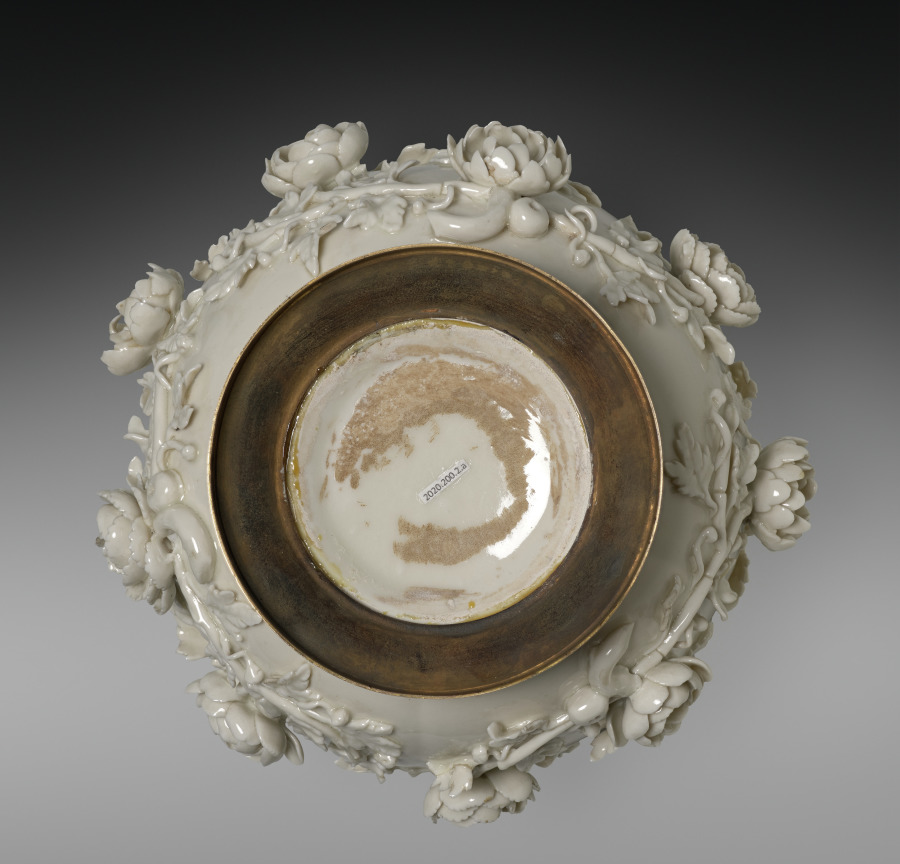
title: Potpourri Vase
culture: France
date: 1860–1880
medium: blanc-de-chine porcelain; gilt bronze mount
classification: Ceramic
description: This vase—part of a pair of covered vases—was created to contain potpourri, a mixture of flowers, herbs, and spices emitting ambient fragrance. This specific function offered a particularly fertile ground for the development of French porcelain from the mid-1700s, as manufactories experimented with forms, surface ornamentations, and placement of perforations. Produced by the firm of Edmé Samson in the 1800s, the vases pay homage to this history. While using updated technique and material, as well as more exuberant decorations, these vases draw upon designs by earlier innovators such as the Saint-Cloud manufactory.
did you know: Potpourri vases always have holes in the top to let the scent of dried spices and flowers contained within freshen the air around them.